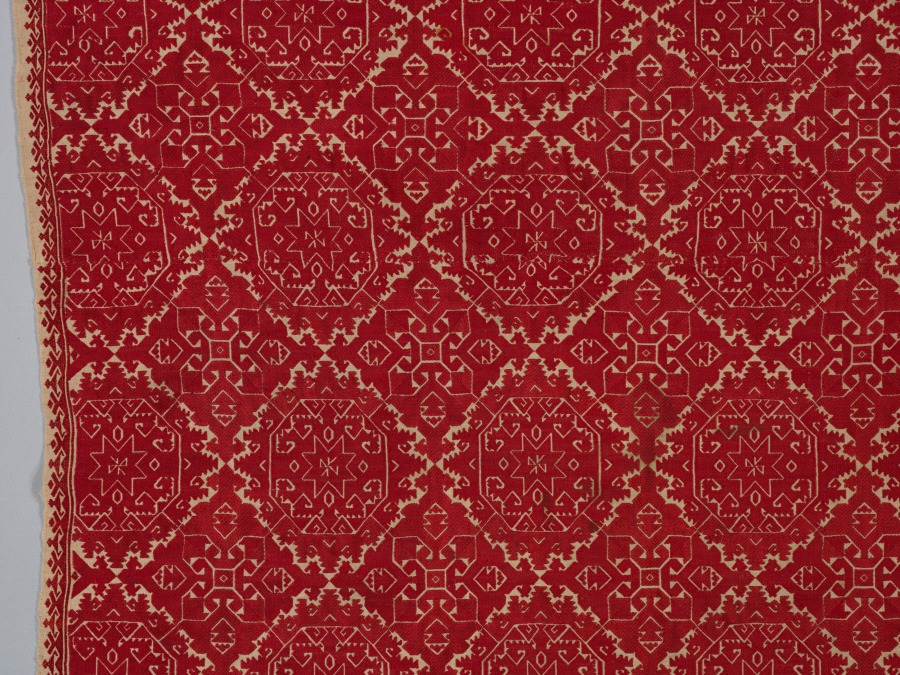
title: Bedspread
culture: Greece, Cyclades Islands, Naxos, 18th century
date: 1700s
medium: embroidery: silk on linen tabby ground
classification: Embroidery